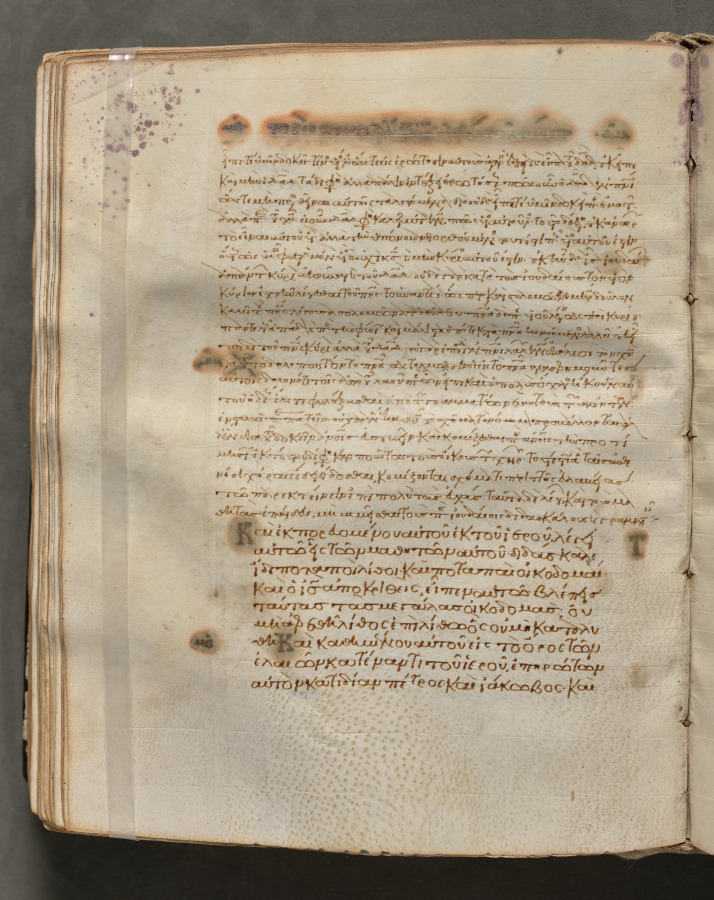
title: Text, folio 180 (verso), from a Gospel Book with Commentaries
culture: Byzantium, Constantinople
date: c. 1000–1100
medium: ink, tempera, and gold on vellum; leather binding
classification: Bound Volume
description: Each of the four gospels in this book opens on a page with brilliantly illuminated borders depicting the author of the text as well as birds-principally peacocks, symbols of the immortality of the soul-and fountains, representing the fountain of life and the salvation of the soul. This volume consists of 428 leaves with texts in Greek. Its level of sophistication suggests that it was probably written and decorated in a monastery in Constantinople.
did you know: Gospel Books were carried in procession through Byzantine churches.